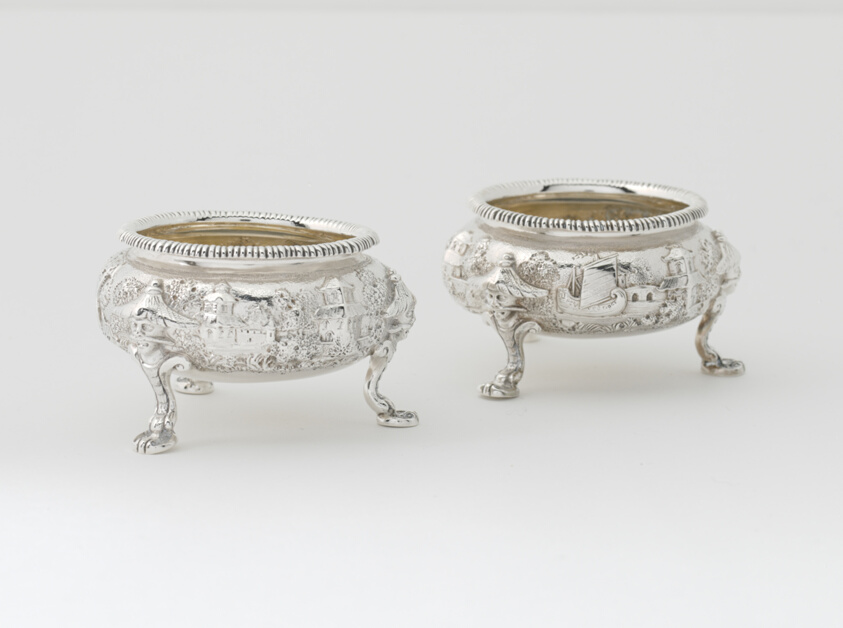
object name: Metalwork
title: Pair of Salts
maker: Charters, Cann, & Dunn; American, 1848–c. 1855; Thomas or James Charters; John Cann, David Dunn; for Ball, Black & Company; American, 1851–1876; New York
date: 1851–55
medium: Silver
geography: New York City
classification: saltcellar; silver; american decorative arts; american arts; decorative arts